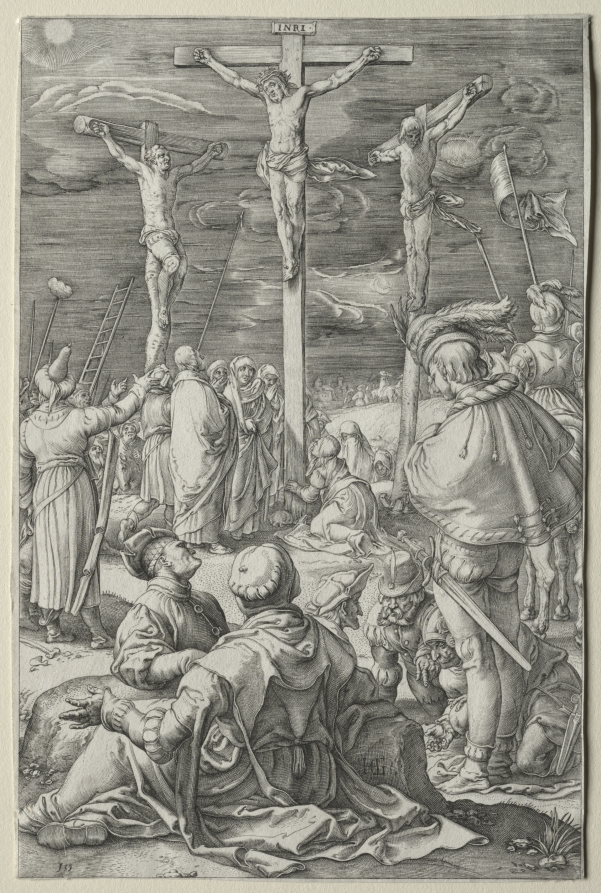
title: The Passion: Christ of the Cross between the Two Thieves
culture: Netherlands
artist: Hendrick Goltzius (Dutch, 1558–1617)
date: 1596–98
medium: engraving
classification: Print